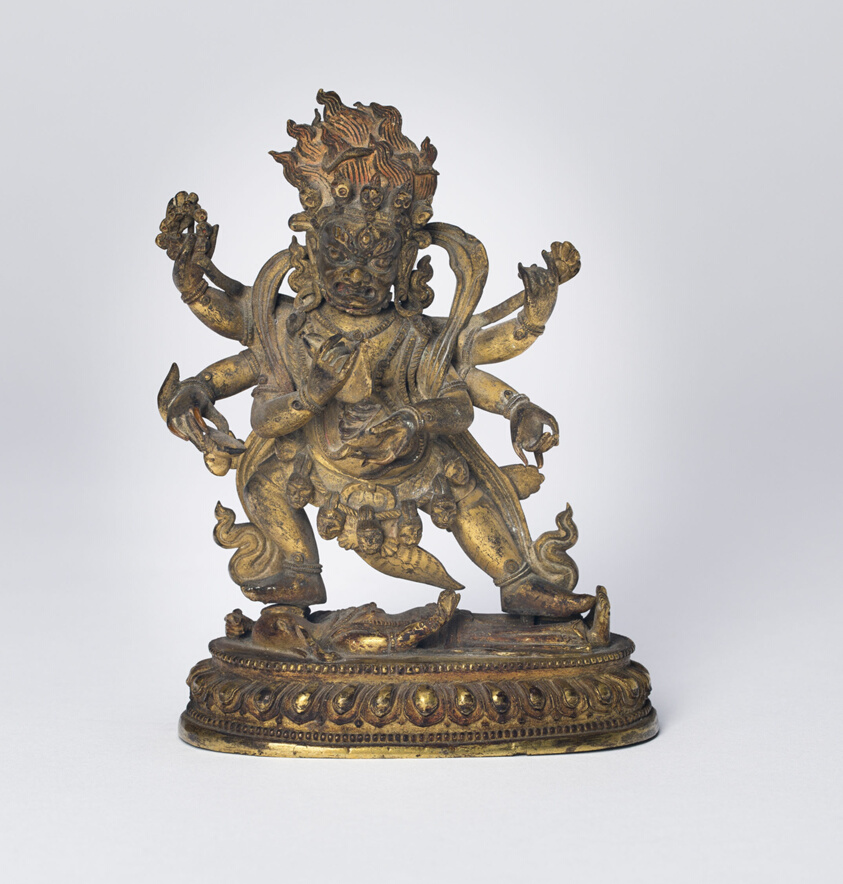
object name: Sculpture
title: Enlightened Protector Mahakala with Six Arms (Shadbhuja)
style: Himalayan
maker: China or Tibet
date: 18th/19th century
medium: Gilt copper alloy with traces of orange pigment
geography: China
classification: bronze; metal; sculpture; asian art